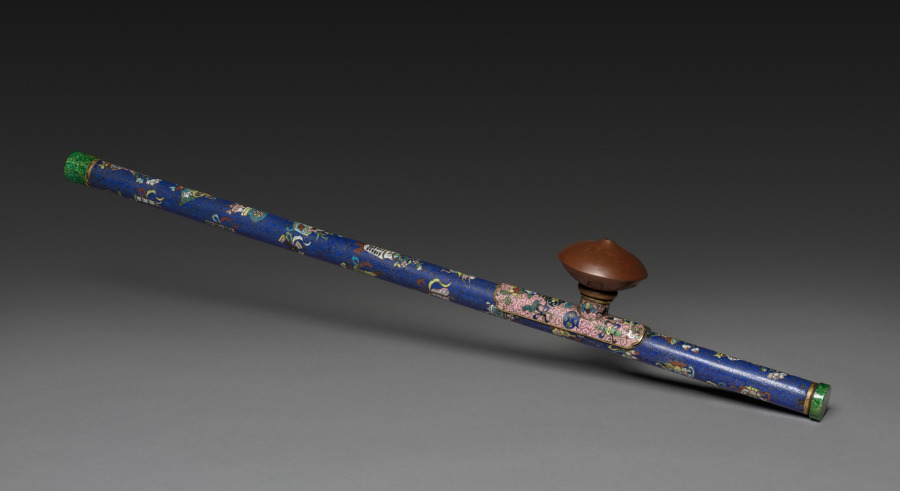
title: Opium Pipe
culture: China, Qing dynasty (1644-1911)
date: 1800s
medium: cloisonné enamel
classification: Miscellaneous